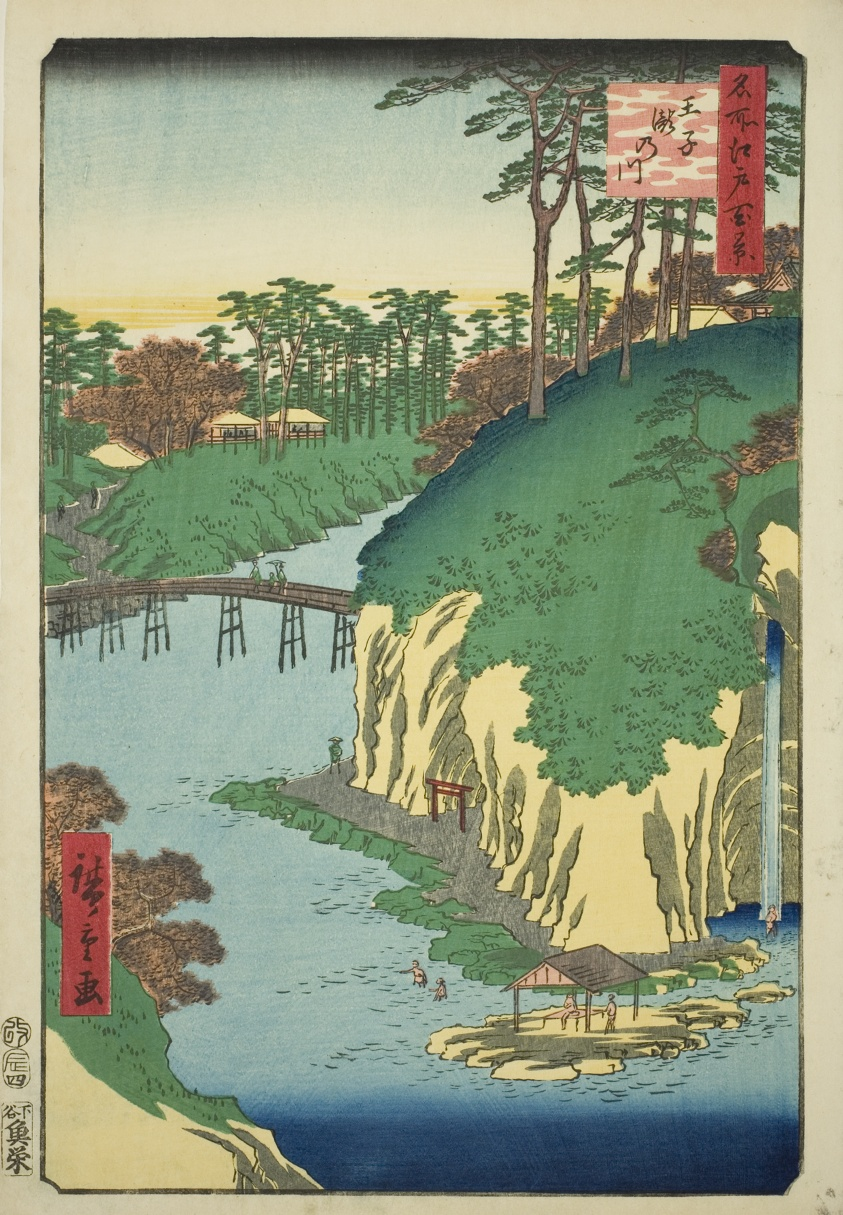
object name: Print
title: The River of Waterfalls at Oji (Oji Takinogawa), from the series "One Hundred Famous Views of Edo (Meisho Edo hyakkei)"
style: Japanese (culture or style)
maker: Utagawa Hiroshige 歌川 広重; Japanese, 1797-1858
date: 1856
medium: Color woodblock print; oban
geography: Japan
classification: woodblock print; print; asian art